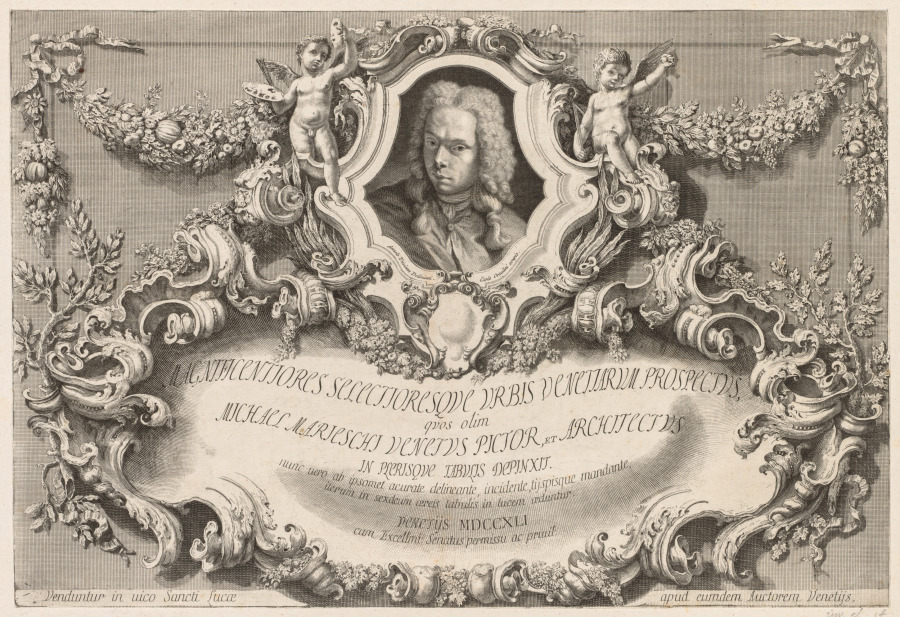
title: Views of Venice: Frontispiece - Title Page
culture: Italy, 18th century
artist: Michele Marieschi (Italian, 1710–1743)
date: 1741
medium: etching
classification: Print